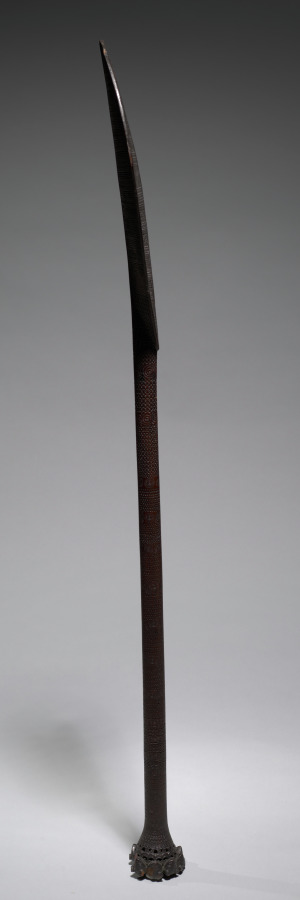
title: Ceremonial Paddle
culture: Polynesia, Ra'ivavae, Austral Islands, 18th-19th Century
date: 1700s-1800s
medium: wood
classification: Sculpture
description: Fine, chip-carved patterns cover the blades and shafts of Austral Islands ceremonial paddles. Squatting human figures carved around the butt are called tiki tiki tangata, meaning man-gods. The shafts of early paddles are usually round in cross-section; 19th-century examples are sometimes square. The function of the intricately carved Austral Islands paddles is uncertain. They may have been displayed on ceremonial occasions, such as dances, pageants, ancestral rituals, or inaugurations.